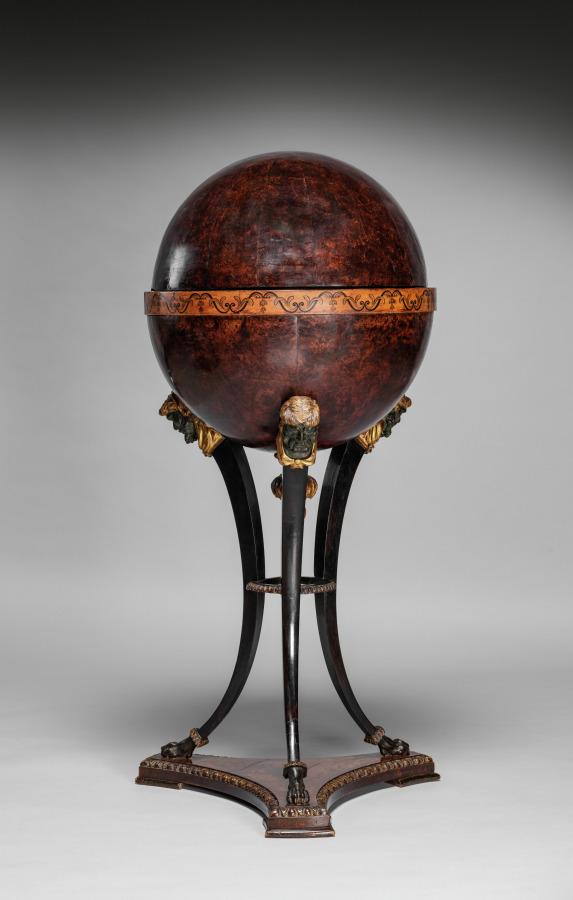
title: Globe Work Table (Globustisch)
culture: Austria, Vienna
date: c. 1810–15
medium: Burl walnut veneer, mahogany, ebony, satinwood, gilt wood, painted wood; mirrored glass; metal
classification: Furniture and woodwork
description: Work tables resembling globes were the usual form for a lady's sewing or writing table around 1800 in Austria. Combining moving parts, secret compartments, and highly finished decoration, these tables were also a way for the cabinetmaker to show off his skill. The tripod supports and temple-like architectural quality of both the exterior and interior decoration reflect the fashionable taste for neoclassical style, or Biedermeier as it was called in Austria, where Vienna was the center of such elaborate furniture production.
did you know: The top half of the globe rotates upward to reveal hidden compartments for sewing tools, threads, and unfinished fabric pieces.